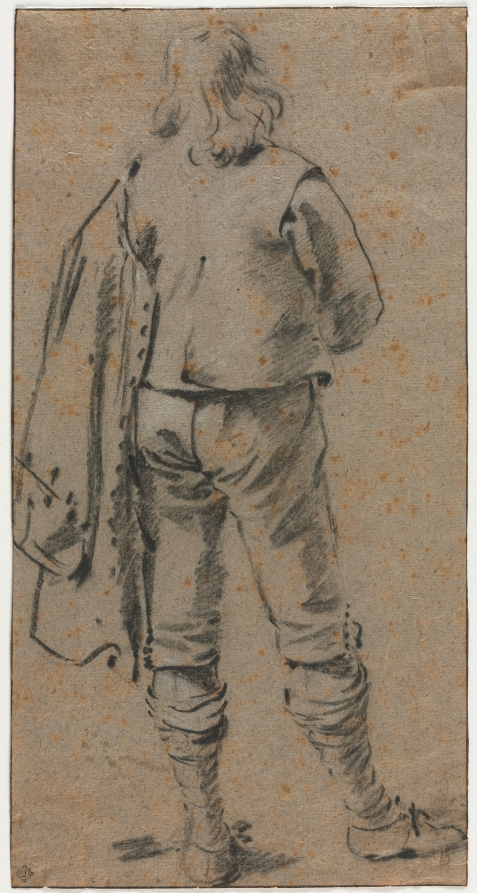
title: A Man Standing Seen from the Back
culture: Netherlands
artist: Gerard ter Borch (Dutch, 1617–1681)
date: c. 1630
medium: black chalk heightened with traces of white chalk; framing lines in brown ink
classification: Drawing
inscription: VERSO, lower center, in graphite: Gérard Terburg ; ON SEPERATELY ATTACHED PIECE OF PAPER, center, printed in black ink: TERBURG (G.) / 83 --- Gentilhomme en pied, vu de dos. / Beau dessin à la pierre noire sur papier teinté. / Collection Desperet.